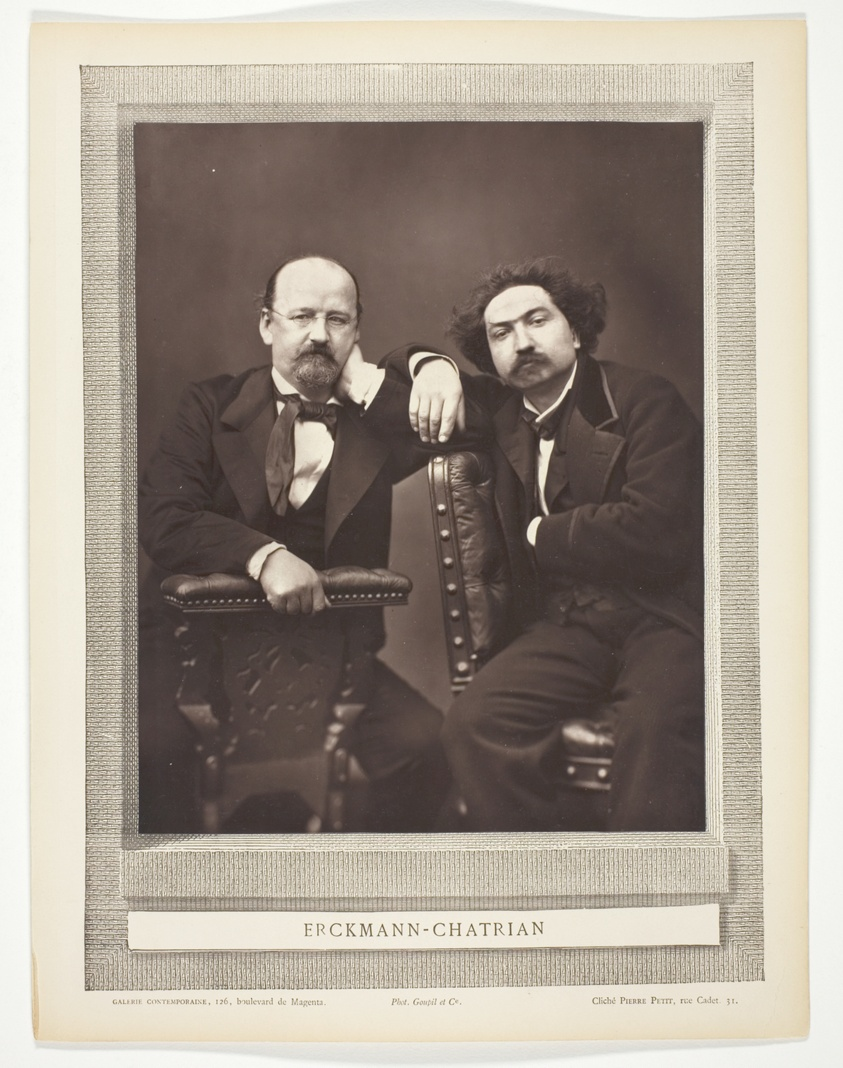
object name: Photograph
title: Émile Erckmann (French writer, 1822-1899) and Alexandre Chatrian (French writer, 1826-1890)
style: 19th century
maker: Pierre Petit (French, 1832–1909)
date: c. 1876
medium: Woodburytype, from the periodical “Galerie Contemporaine Littéraire, Artistique” (1876), volume 1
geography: France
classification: woodburytype; photomechanical process; photography; photograph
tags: Collected by Hugh Edwards, Contemporaine Littéraire